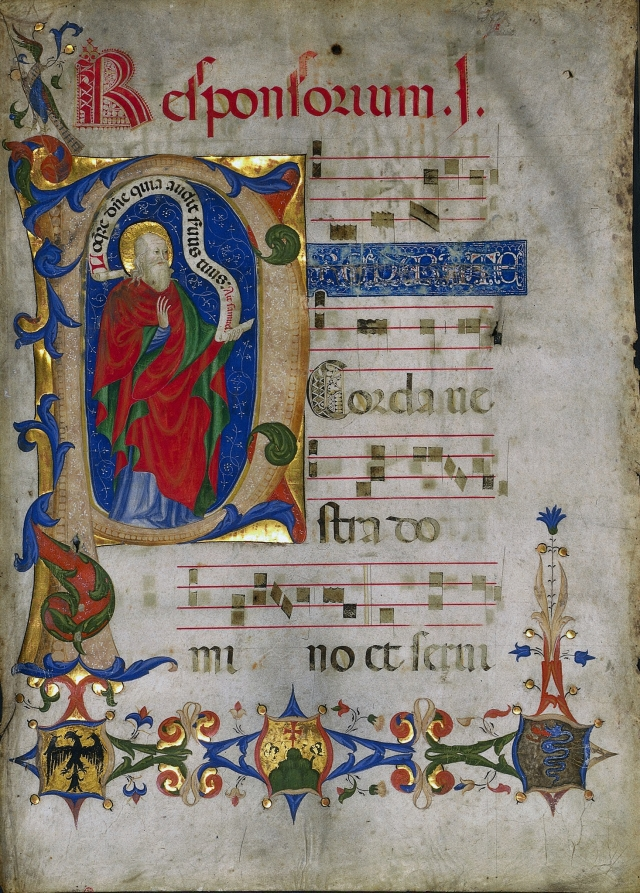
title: Leaf from an Antiphonary: Historiated Initial P with the Prophet Samuel; Arms of the Visconti Family and the Olivetan Order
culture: Italy, Milan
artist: Olivetan Master (Italian)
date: c. 1439–47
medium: ink, tempera and gold on vellum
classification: Manuscript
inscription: Responsorium 1 Loquie domine quia audit servus tuus : Ait Samuel Preparate Corda vestra domino et Servite illi soli et liberabit nos de manibus inimicorum vestorum Confitemini ad deum...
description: This leaf is distinguished by a large initial P depicting Samuel, the last and one of the greatest of Israel’s judges. It introduces the text Preparte corda vestra domino et servite (“Prepare your hearts for the Lord and serve”). In the lower margin are the arms of the Visconti family, rulers of Milan, featuring an eagle (left) and a coiled serpent (right). At bottom center is the emblem of the Olivetan Order, a reformed branch of the Benedictines founded in 1319 known as the “white monks.” The Olivetan monastery in Milan was founded in 1400 and it appears that this leaf belonged to a set of choral books presented to the monastery by one of the Visconti, perhaps about 1439–47. The so-called Olivetan Master takes his name from a luxuriously illustrated psalter made for the order’s monastery in Milan, where he was undoubtedly a monk.